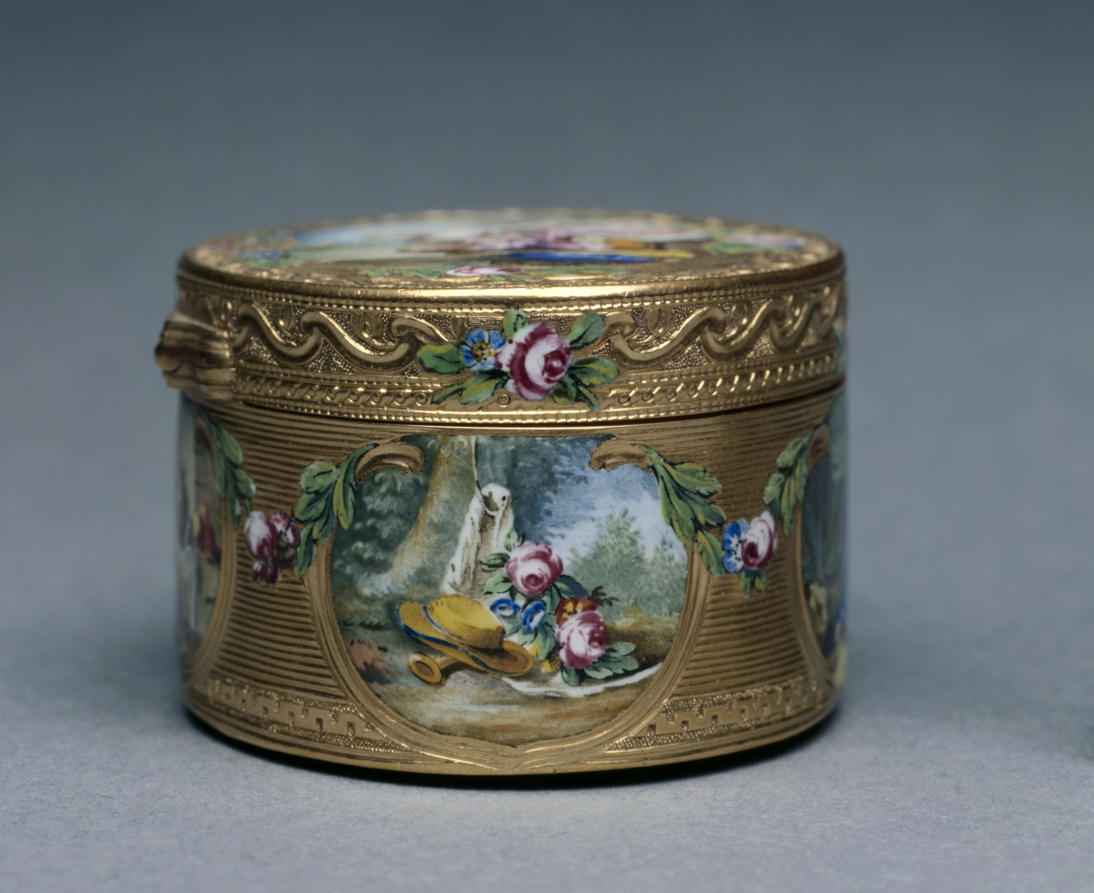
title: Snuff Box (Tabatière)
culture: France, 18th century (style of Louis XV)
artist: Francois Guillaume Tiron (French)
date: 1761–62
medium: gold and enamel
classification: Miscellaneous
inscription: [Maker's mark of Francois-Guillaume Tiron, master goldsmith in 1747, inside cover]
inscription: [Warden's mark, Paris, 1761-1762, inside cover]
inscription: [Charge mark of Eloi Brichard and Etienne Somfoye, Paris, 1756-1762, inside cover]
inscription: [Maker's mark of Francois-Guillaume Tiron, inside bottom]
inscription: [Warden's mark, 1761-1762, inside bottom]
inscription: [Charge mark of Brichard and Somfoye, inside bottom]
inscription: [Maker's mark of FG Tiron, left wall]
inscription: [Charge mark of Brichard and Somfoye, left wall]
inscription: [Warden's mark, Paris, 1761-1762, left wall]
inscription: [Discharge mark of J.J. Prevost, Paris, 1762-1768, bezel at right]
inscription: [Engraved number, maybe retailer's number]: "n. 13676"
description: The pastoral scenes that decorate this box are typical of the style of François Boucher, a celebrated painter of the period whose works were popularly reproduced on decorative arts. Snuff boxes, used practically as containers for powdered tobacco, were often decorated with miniature reproductions of notable works. The miniature on the cover is inspired by Boucher’s The Galant Pastor (Le Pasteur Gallant) (1738) and that on the bottom by The Amusement of the Shepherd Girl (L’Amusement de la Bergère) (1700s).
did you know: François Boucher was a favorite of the French royal court of Louis XV and named first painter of the king in 1765.